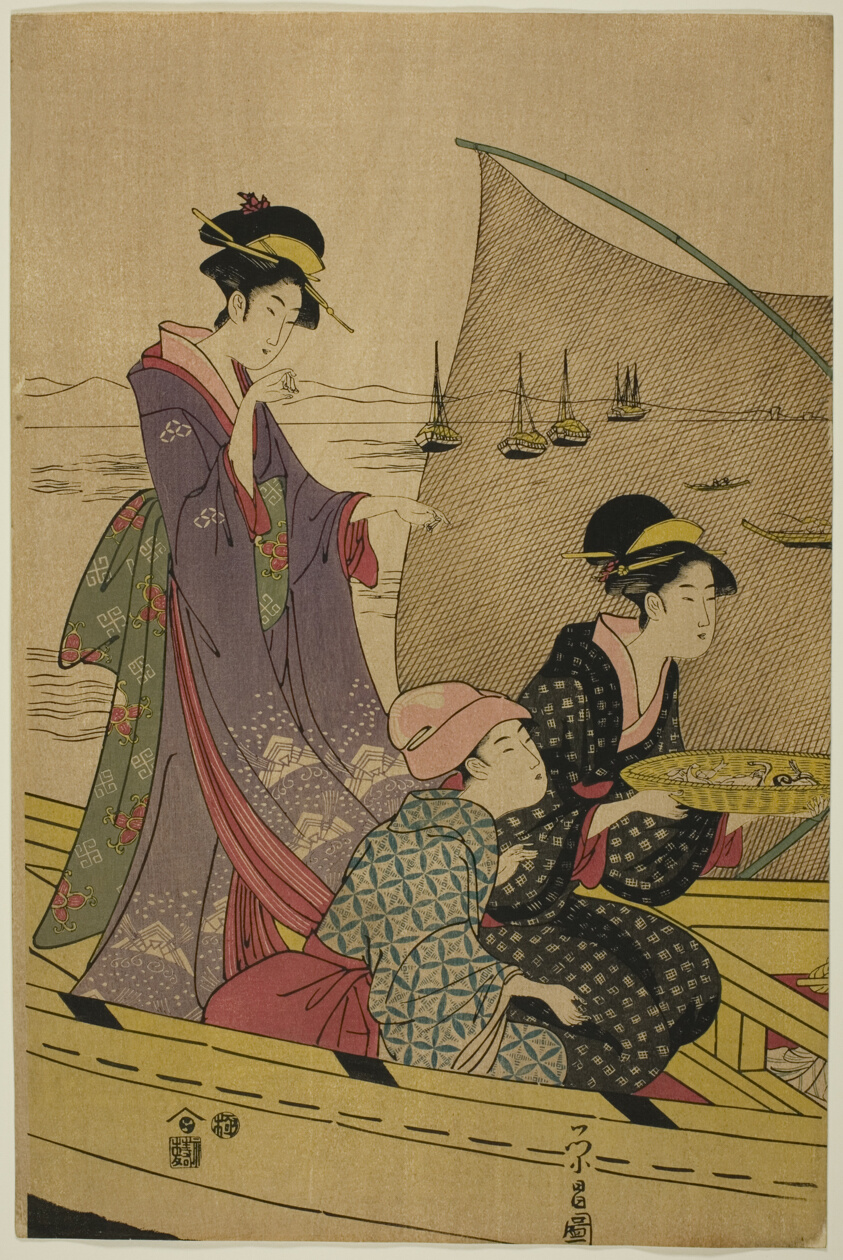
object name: Print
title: Women on a Fishing Boat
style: Japanese (culture or style), edo (japanese period), Japanism, East Asian, asian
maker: Chokosai Eisho (Japanese, active 1780-1800)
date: c. 1780/1800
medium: Color woodblock print; left sheet of oban triptych (right sheet: 1997.729a, center sheet: 1997.729b)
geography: Japan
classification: woodblock print; print; asian art